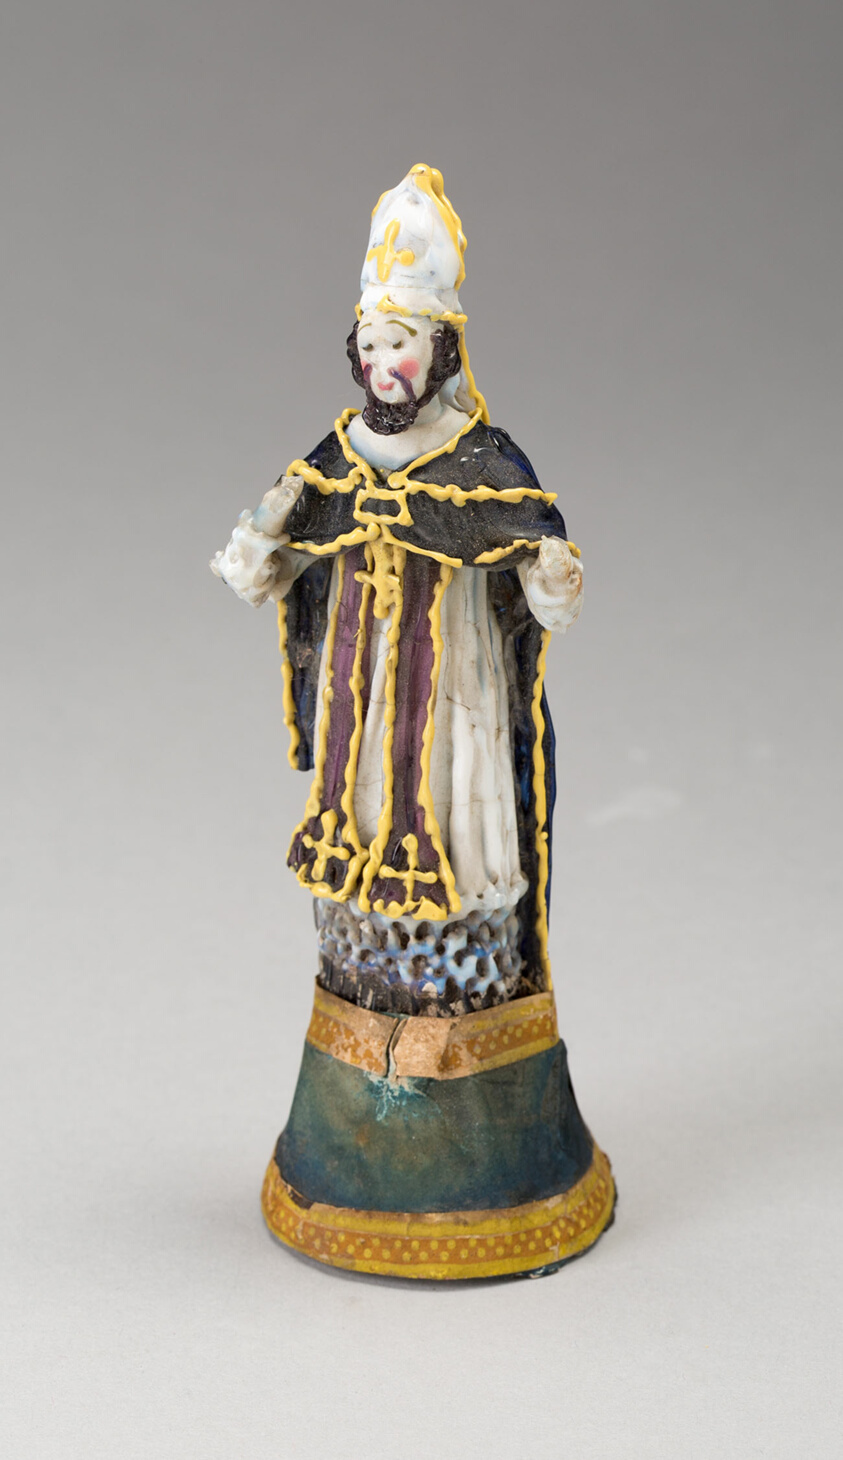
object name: Glass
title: Bishop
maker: Nevers, France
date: Early to Mid 18th century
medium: Glass; lampwork (verre de Nevers), metal armature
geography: France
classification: decorative object/ornament; lampwork; glass; european decorative arts